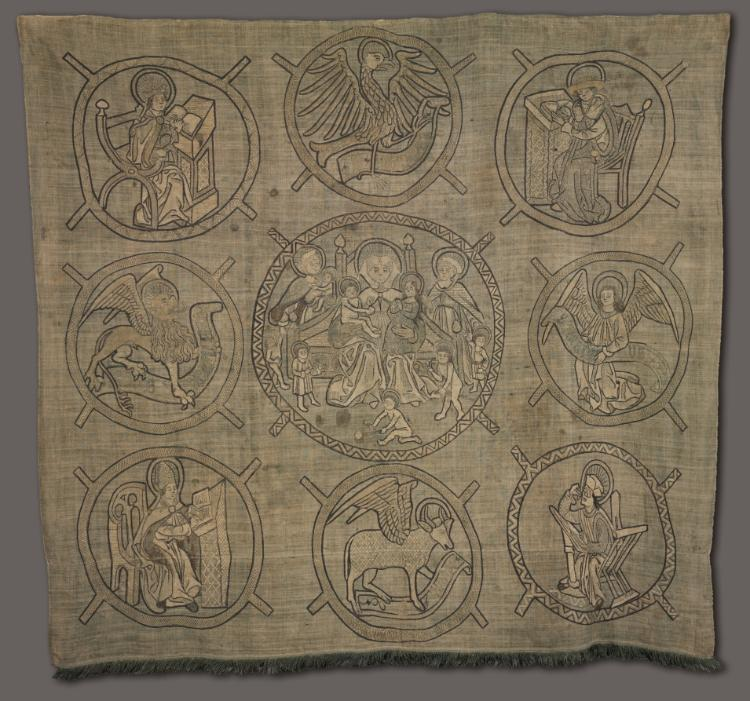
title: Embroidered Panel: Holy Kinship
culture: Germany or Switzerland, 16th century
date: 1500s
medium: embroidery: silk and linen on linen ground; contours of design applied with ink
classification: Embroidery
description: In the late Middle Ages, the life of Jesus was increasingly embellished by other figures and stories. Part of this is the theme of the holy kinship, represented in the central medallion. It was based on an apocryphal account (unsanctioned by certain canons) of the three marriages of Saint Anne, mother of the Virgin. The central theme is accompanied by the main authorities of the Catholic Church, the Evangelists, and the Church fathers. The monumentality of the design, the dignity and spontaneity of the figures, and the fine execution of the embroidery itself distinguishes this as one of the finest examples of Swiss or South German linen embroidery of the 1500s.